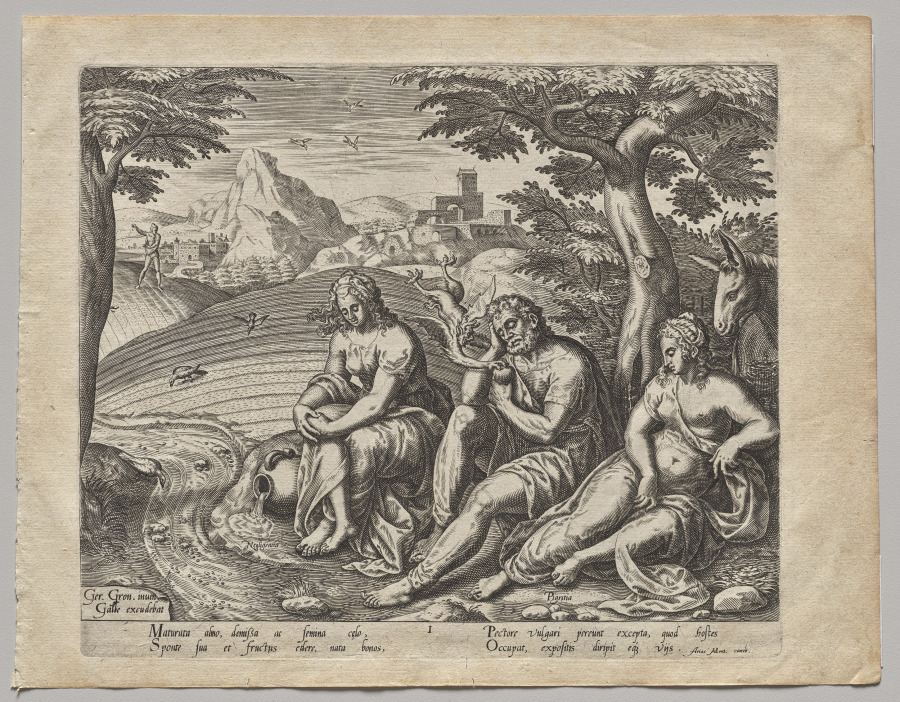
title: The Seed Falling by the Wayside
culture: Netherlands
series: Parable of the Sower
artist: Philip Galle (Flemish, 1537–1612)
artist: after Gerard van Groeningen (Flemish)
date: 1574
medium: engraving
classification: Print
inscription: Watermark: “SN”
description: This is one of a series of four prints portraying the biblical parable of the sower, made in Antwerp (in present-day Belgium) at the end of the 1500s. The parable compares types of soil to people in the world: one hardened; one fickle; one distracted by things of the world; and one with an open heart, ready to accept God. In this image of the sower hardened to the word of God, the man has fallen asleep beside the field while a small devil steals the word of God from his heart.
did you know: Two allegorical figures, Negligence and Sluggishness, seated at either side of the sleeping sower indicate two sources of his problems.